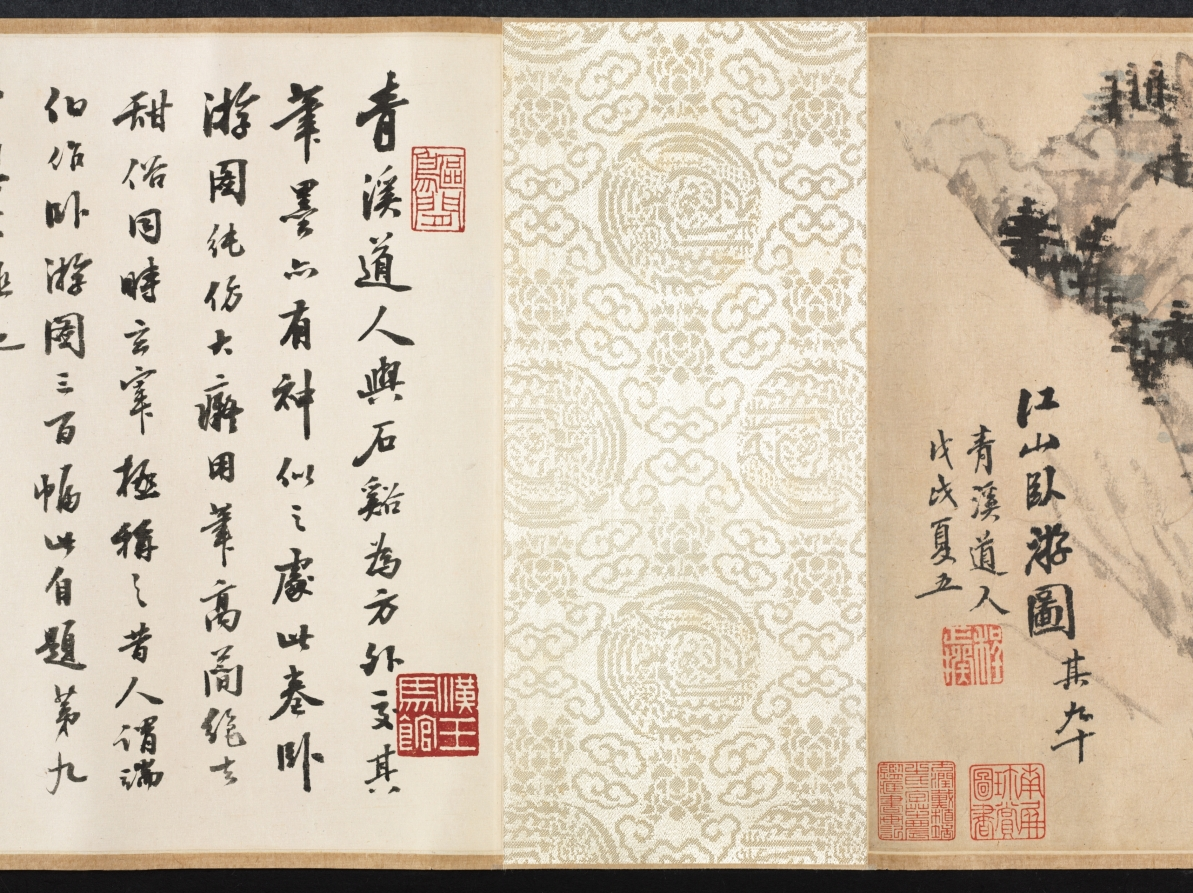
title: Dream Journey among Rivers and Mountains, no. 90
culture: China, Qing dynasty (1644-1911)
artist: Cheng Zhengkui (Chinese, 1604–1676)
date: 1658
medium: Handscroll; ink and color on paper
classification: Painting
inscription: 江山臥遊圖其九十, 青溪道人, 戊戌夏五。 [印] 程正揆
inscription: Title and inscription by Huang Yi 黃易 (1744–1802), and 3 seals.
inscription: 1 colophon and 9 additional seals: 3 seals of Dai Zhi 戴植 (active about 1821–1850); 1 colophon, dated 1914, and 3 seals of Yan Shiqing 顏世清 (1873–1929); 3 seals of Wang Nanping 王南屏 (1924–1985).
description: Cliffs and waterfalls interspersed with trees and dotted vegetation are spread over this handscroll. Long paths wind their way through villages, beside cottages, shrines, and over bridges. In the past, Chinese literati officials liked to take a “dream journey” along mountains and rivers when viewing landscape paintings in their studios. Scenery of this kind thus became a way to escape from the world of bureaucracy and administration. The painter Cheng Zhengkui used the title “Dream Journey” for a whole series of paintings, of which this is number 90. He is said to have painted 500 of them, but the actual count remains unknown.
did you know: Cheng Zhengkui planned to make 100 dream journey paintings but may have ultimately made 500.